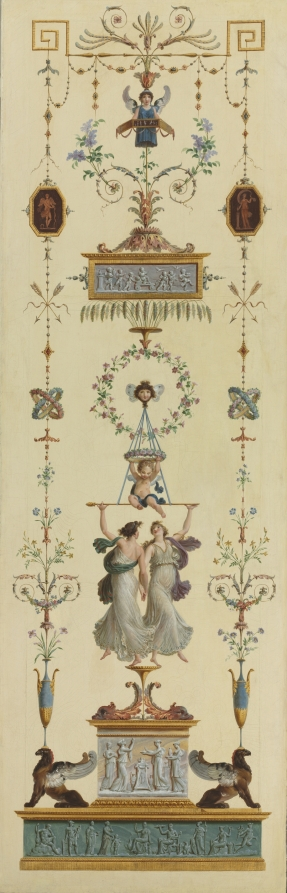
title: Decorative Panel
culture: France, 18th century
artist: Pierre Rousseau (French, 1751–1829)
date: 1790s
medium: oil on canvas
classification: Painting